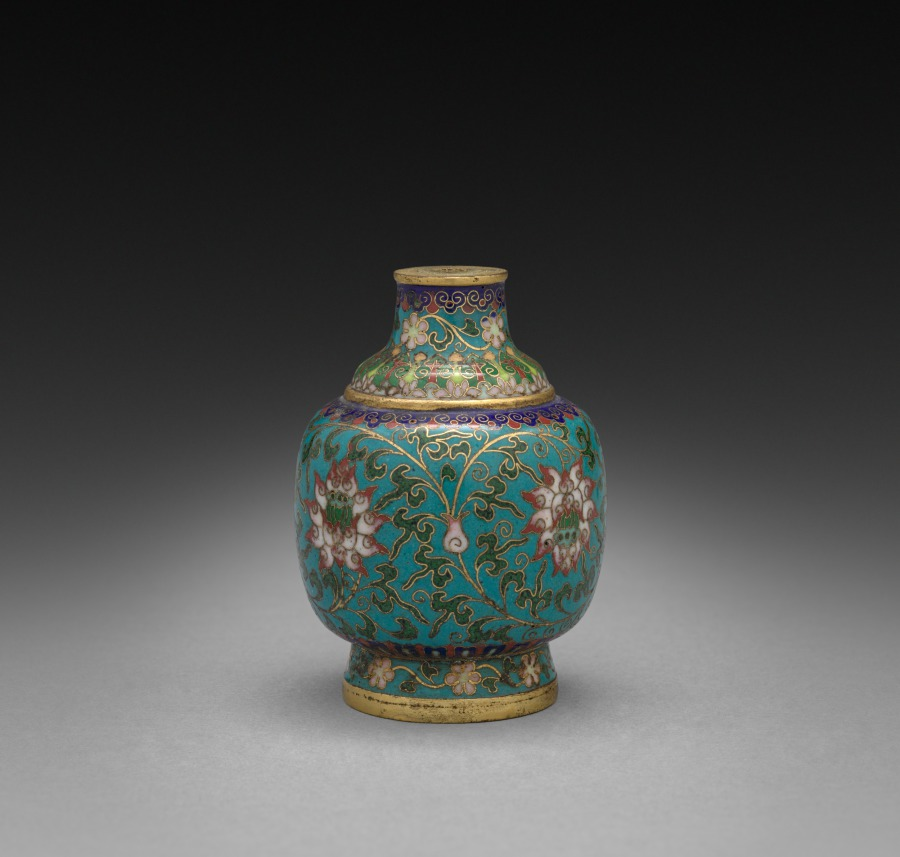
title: Snuff Bottle with Floral Scrolls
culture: China, Qing dynasty (1644-1911), Qianlong mark and reign (1736-95)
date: 1736–95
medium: cloisonné enamel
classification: Enamel